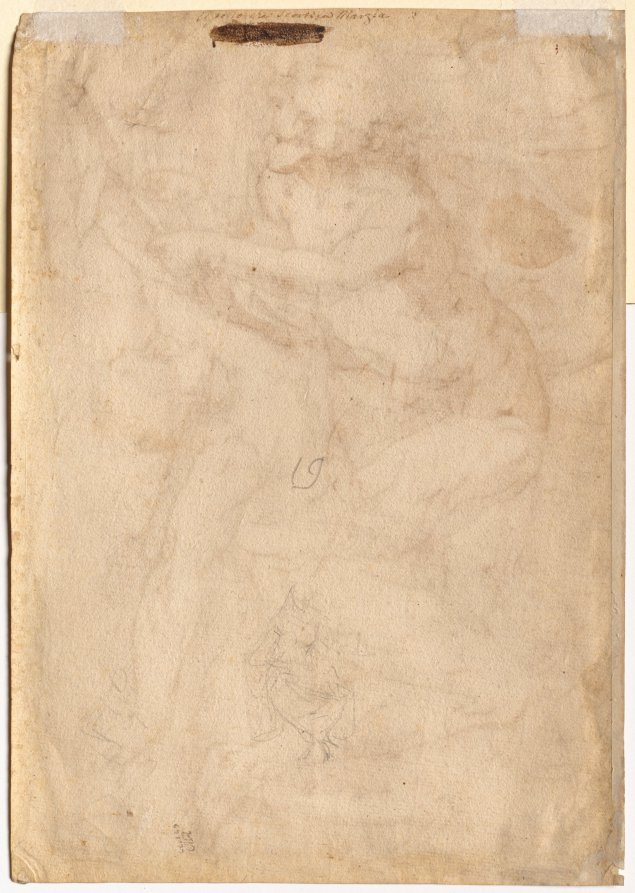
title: Two Sketches of a Mother and Child (verso)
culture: Germany (or Netherlands), 16th century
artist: Anonymous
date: 1500s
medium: graphite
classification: Drawing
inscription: upper center, in brown ink: Apollo chi scortica Marzia ; center, in graphite: 19